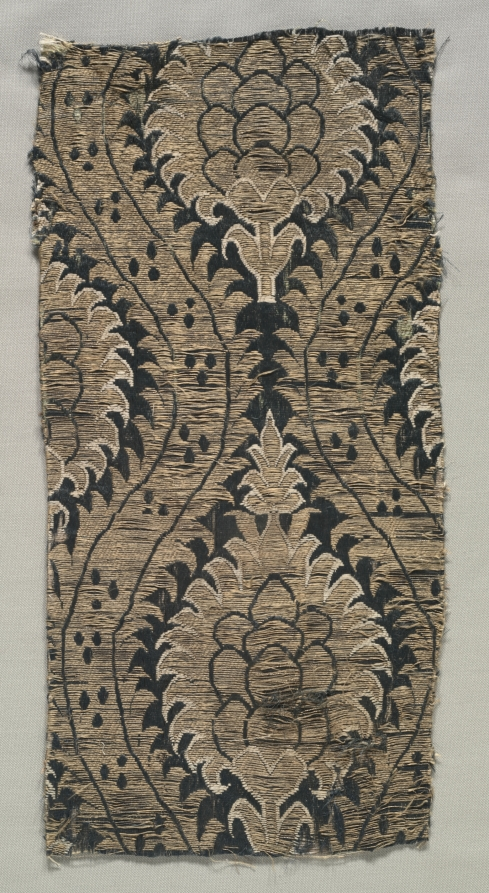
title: Textile Fragment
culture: Turkey, Bursa, late 16th century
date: late 16th century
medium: brocaded silk with metal thread weft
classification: Textile